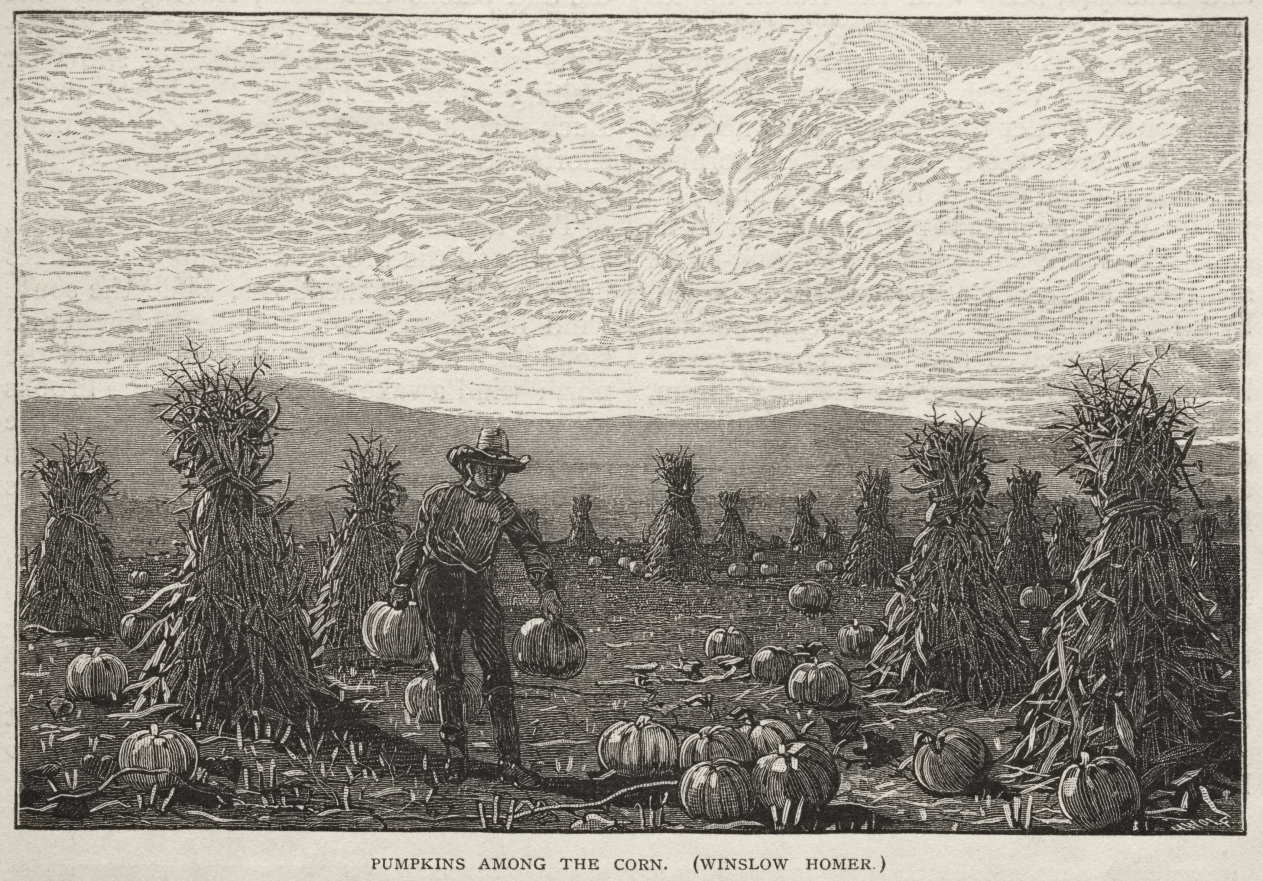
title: Pumpkins Among the Corn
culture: America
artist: Winslow Homer (American, 1836–1910)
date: 1878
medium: wood engraving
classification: Print